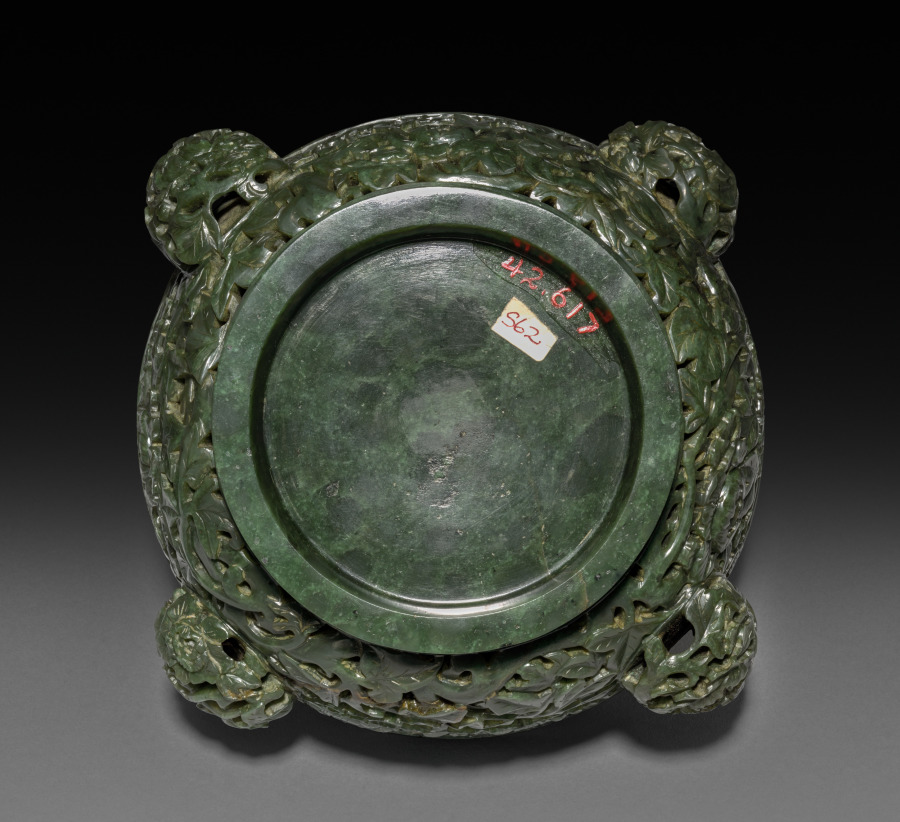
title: Fragrance Container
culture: China, Qing dynasty (1644–1911), Qianlong reign (1736–95)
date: 1736–95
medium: jade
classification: Jade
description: In the Qing (1644–1911) dynasty, luxury items became more affordable to larger parts of the society, including women, merchants, and literati in non-official positions. Imperial patronage and a growing urban population encouraged consumption of luxury goods and local craftmanship. This spinach-green jade incense burner has pierced floral designs and four pierced floral handles. It illustrates the superb carving skills and the creative mind of its accomplished creator, who sought clients on a competitive market